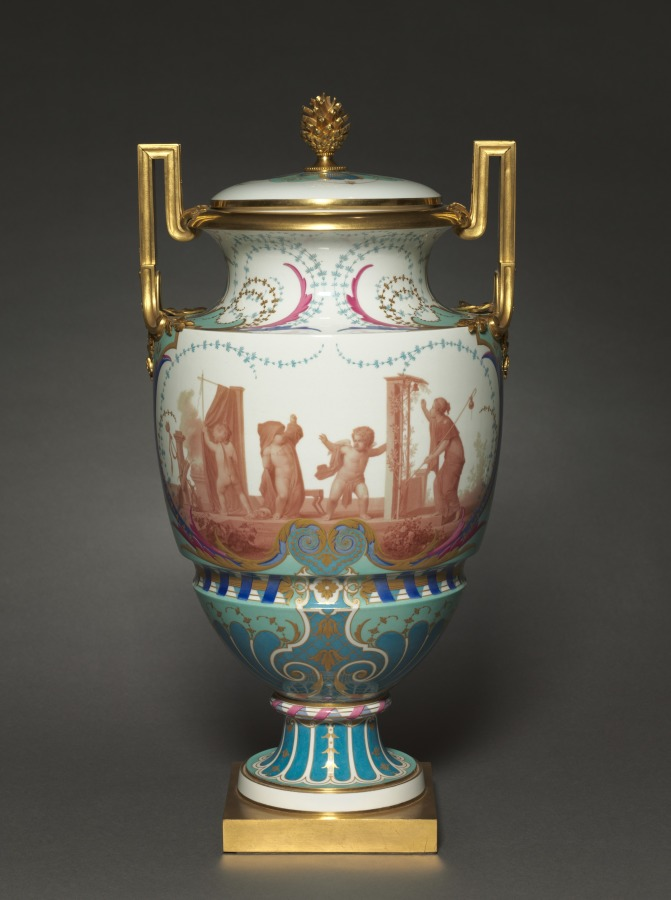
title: Vase Feuille d'Eau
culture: France, Sèvres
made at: Sèvres Porcelain Factory (French, est. 1756)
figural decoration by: Paul Marie Roussel (French, 1804–1877)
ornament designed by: Emile Renard (French)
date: 1858–62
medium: porcelain with gilt bronze mounts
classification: Ceramic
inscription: figural paintings signed obverse and reverse: "PMROUSSEL INV & PIN"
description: Feuille d'Eau means "waterleaf" and refers to the name given to the shape of this vase at the Sèvres factory. In English, waterleaf is the common name for a plant with bell-shaped flowers. The term is also applied to a stylized plant motif used in Graeco-Roman ornament. This vase was exhibited by the Sèvres firm at the International Exhibition held in London in 1862.